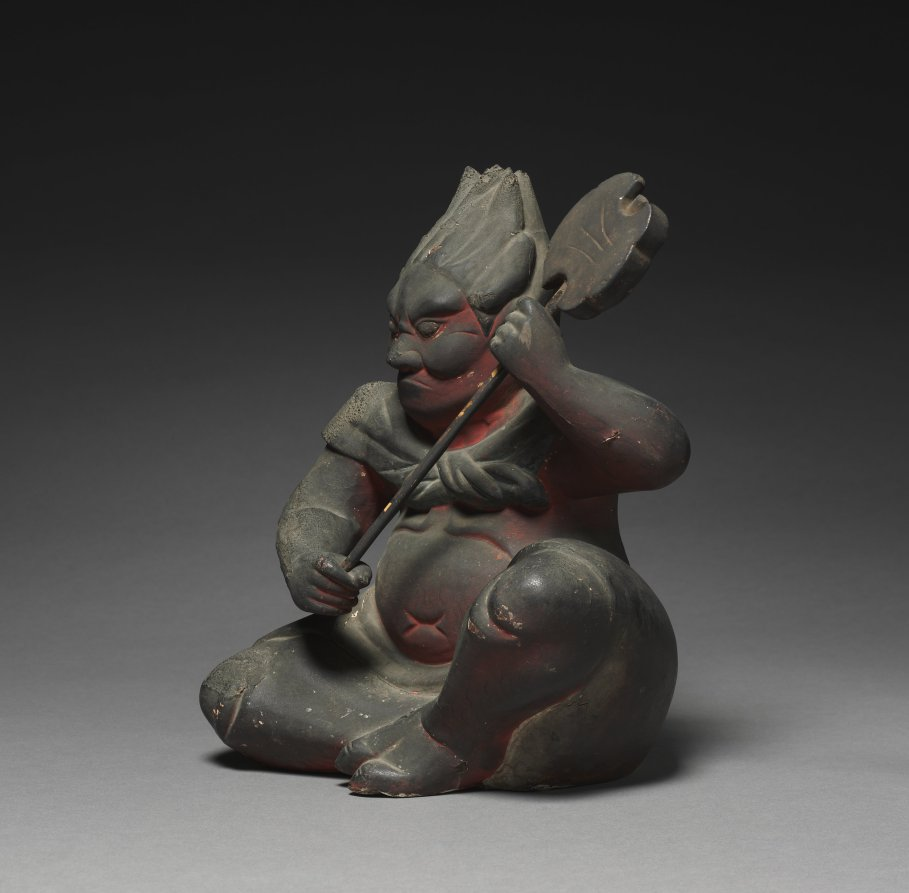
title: Seated Zenki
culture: Japan, Muromachi period (1392–1573)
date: 1400s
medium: wood with pigment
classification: Sculpture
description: The axe-wielding red Zenki, and the vase-holding, bamboo backpack-wearing green Koki are both under the mystical control of the monk, En no Ozunu (legendarily 634–701), also known as En no Gyōja, or “En the Ascetic,” considered to have founded Shugendō, a style of religious practice focused on performing austerities in mountainous settings.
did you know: A popular Japanese comic named Zenki was inspired by the figure seen here wielding a weapon.